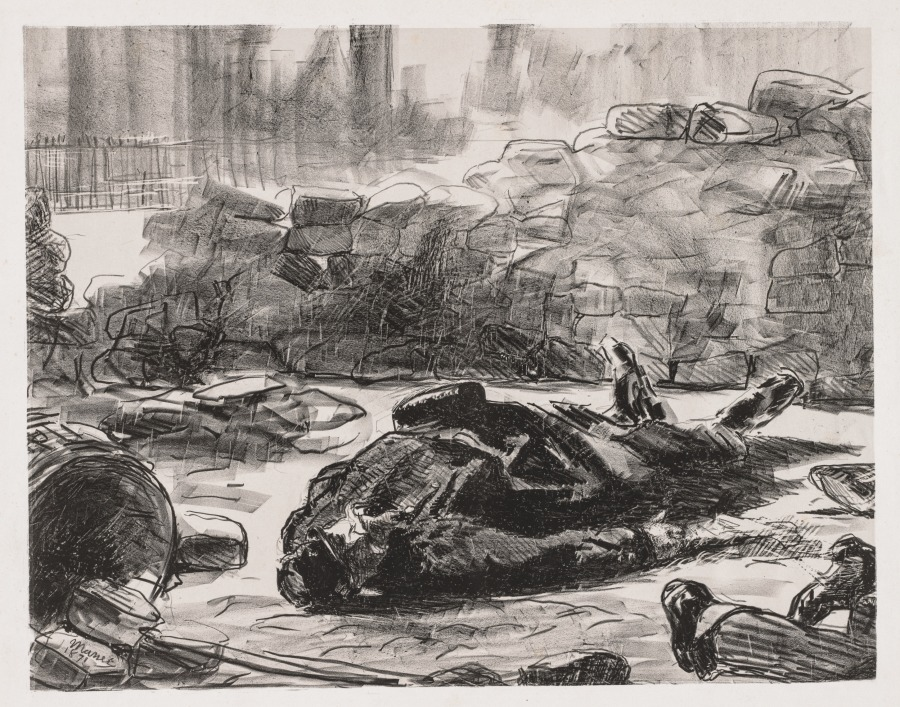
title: Civil War (Scene of the Commune of Paris)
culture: France, 19th century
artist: Édouard Manet (French, 1832–1883)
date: 1871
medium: lithograph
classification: Print